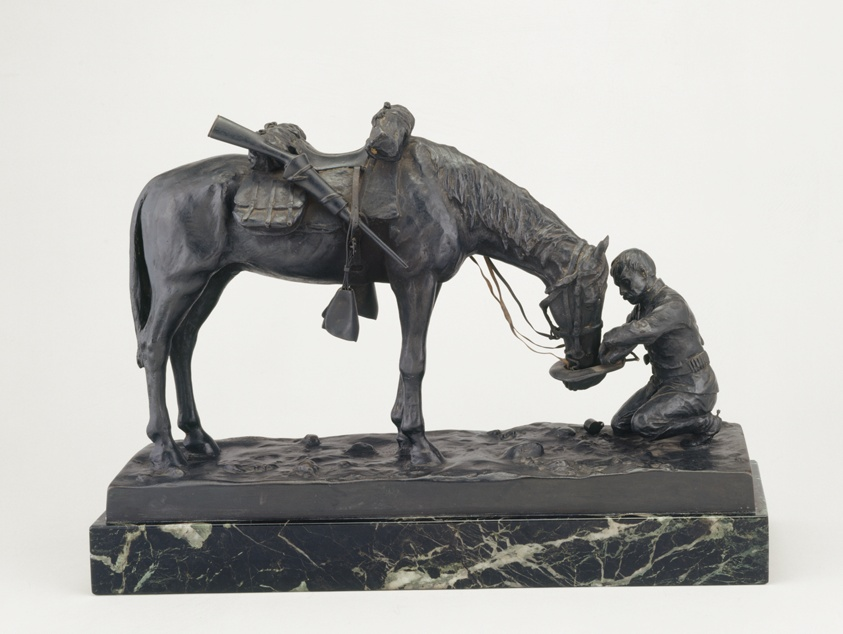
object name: Sculpture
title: The Last Drop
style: 20th Century, American west, western art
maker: Charles Schreyvogel (American, 1861–1912); Cast by Roman Bronze Works (American, founded 1897)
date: Modeled 1903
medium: Bronze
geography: United States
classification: sculpture; modern and contemporary art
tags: horse, water, soldiers